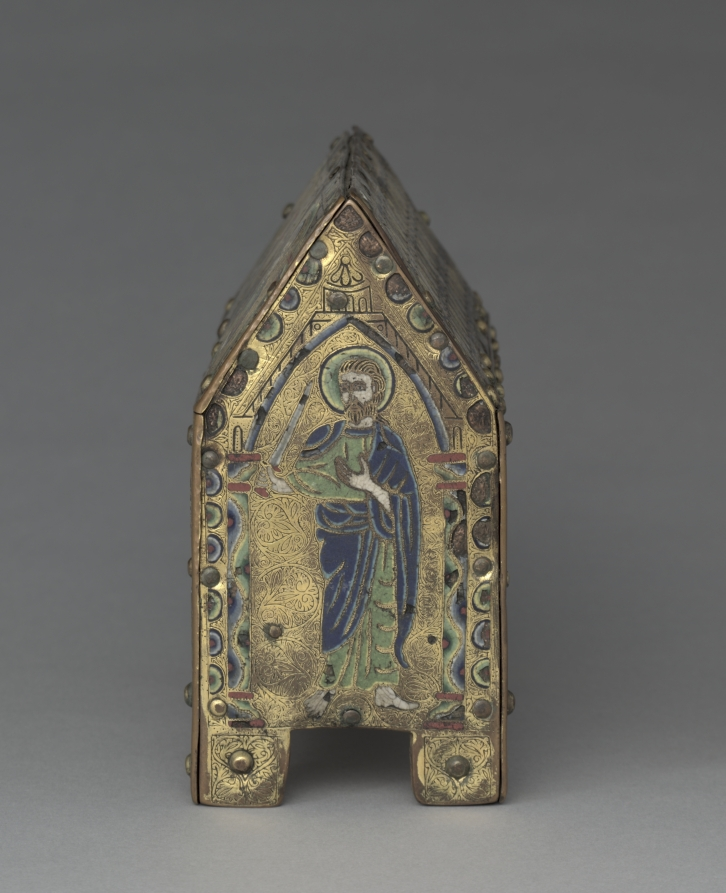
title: Chasse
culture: France, Limousin, Limoges, Gothic period, first half of 13th century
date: 1200–1250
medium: copper: gilded, engraved, chased; champlevé enamel; wood core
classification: Enamel